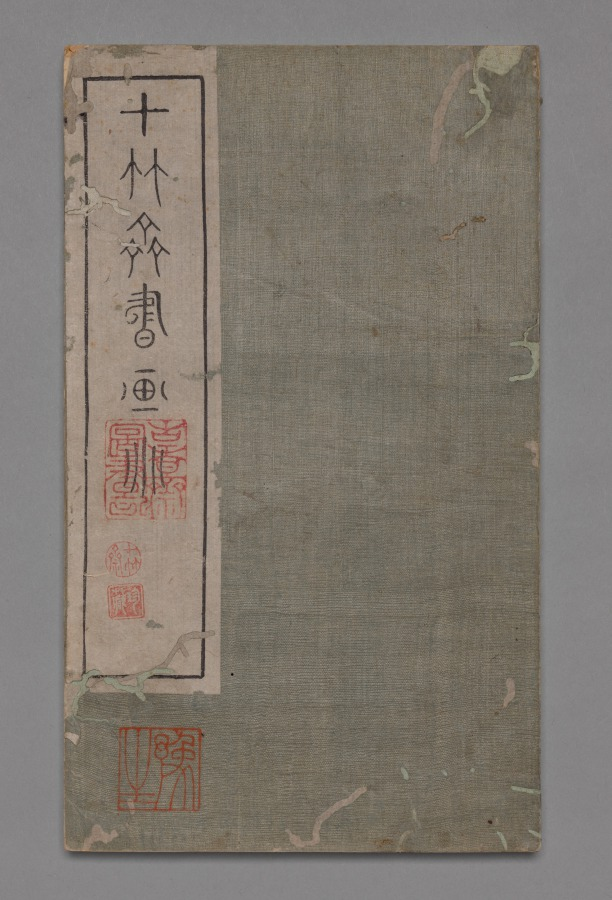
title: Ten Bamboo Studio Collection of Calligraphy and Painting: Round Fans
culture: China, Qing dynasty (1644-1911)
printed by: Hu Zhengyan (Chinese, c. 1584–1674)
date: 1633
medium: Woodblock-printed book; ink and colors on paper; first edition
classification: Print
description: Color printing reached a level of perfection in the early 1600s, as seen in this Ten Bamboo Studio Collection of Calligraphy and Painting and the Mustard Seed Garden Manual of Painting (printed 1679 and 1701). The painterly quality, precision in registering (aligning) the woodblocks, and harmonious colors made them the most successful color print editions in Chinese history. Both editions were printed and compiled in Nanjing, spread nationwide, and had a great impact on the arts in Japan and Korea.